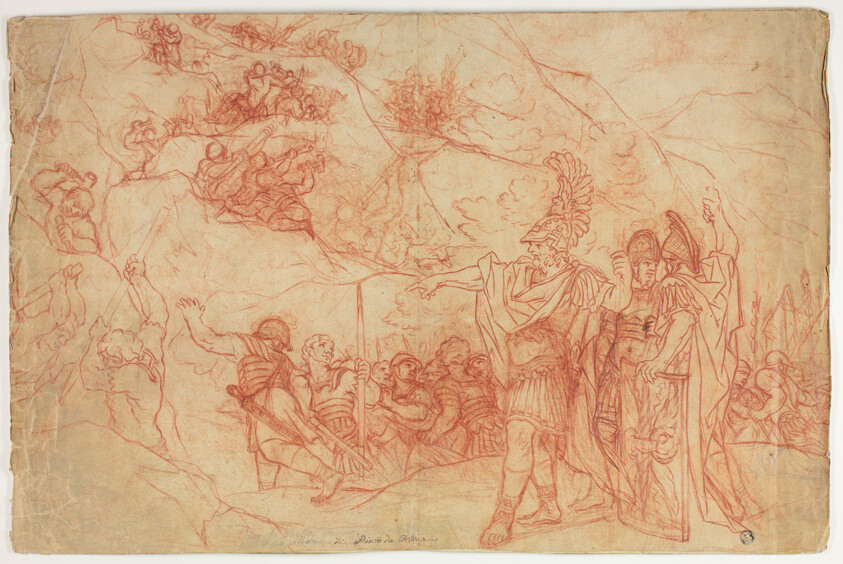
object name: Drawing and Watercolor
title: Roman Commander Ordering Attack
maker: After Pietro da Cortona; Italian, 1596-1669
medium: Red chalk with graphite, on cream laid paper, laid down on cream laid paper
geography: Italy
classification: chalk; drawings (visual works); prints and drawing